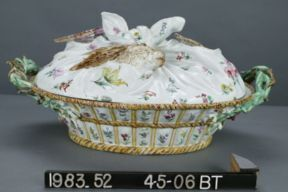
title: Covered Tureen in the Form of a Basket of Game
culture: France, 18th century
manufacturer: Sceaux Factory (French, active 1748–66)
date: c. 1755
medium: Tin- glazed earthenware (faience) wth enamel decoration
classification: Ceramic